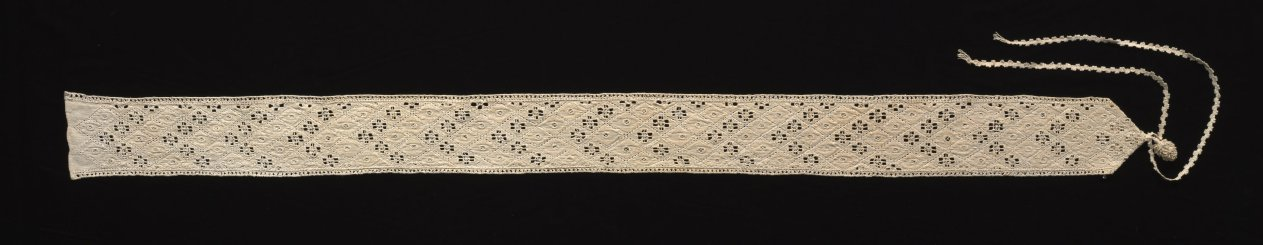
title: Swaddling Band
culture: Italy, Sicily, 1500s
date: 1500s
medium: Linen: needle lace (cutwork) with tassel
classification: Lace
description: The narrow flat band attached to the end of this swaddling band is called a fascia.